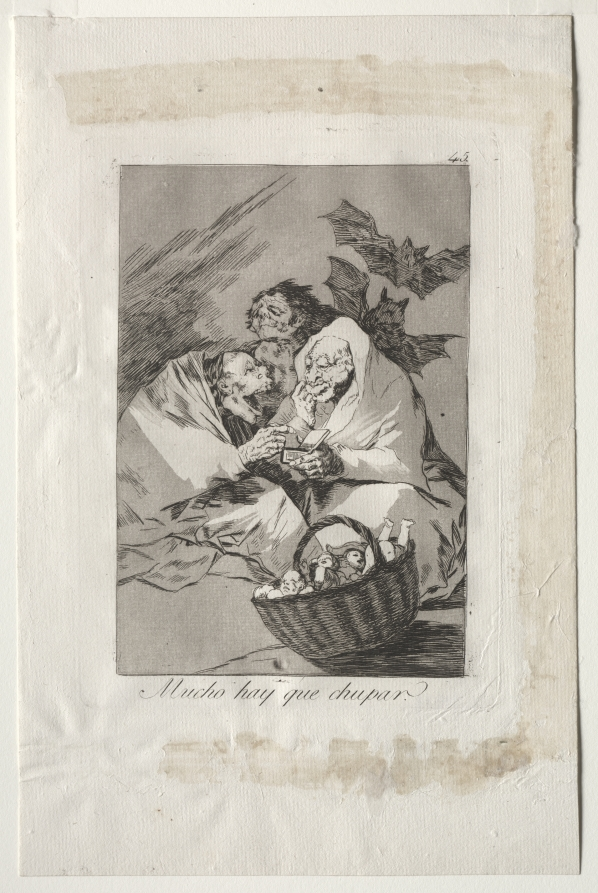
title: There is Plenty to Suck, Plate 45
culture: Spain, late 18th Century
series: Los Caprichos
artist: Francisco de Goya (Spanish, 1746–1828)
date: 1799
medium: etching and aquatint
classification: Print